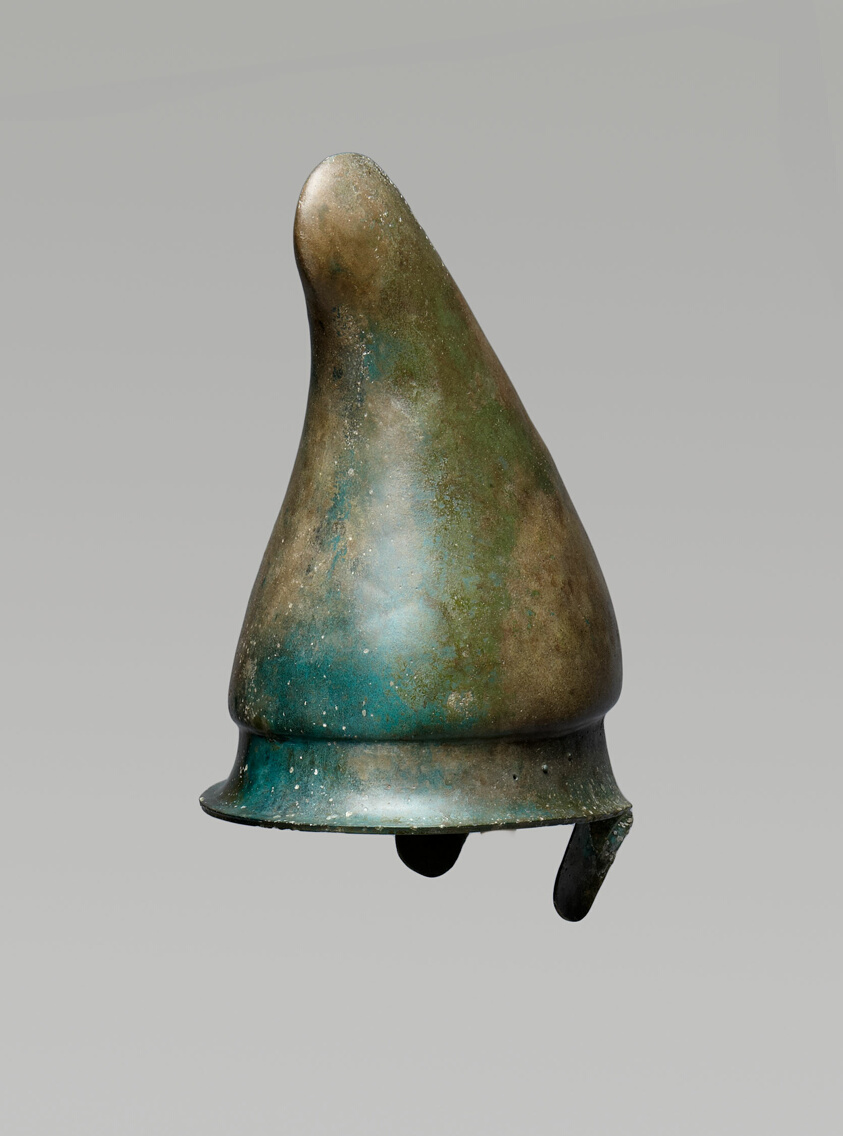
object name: Armor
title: Helmet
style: greek, ancient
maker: Greek; ancient Macedon, Greece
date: 4th century BCE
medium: Bronze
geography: Macedonia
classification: bronze; metalwork; ancient art; armor